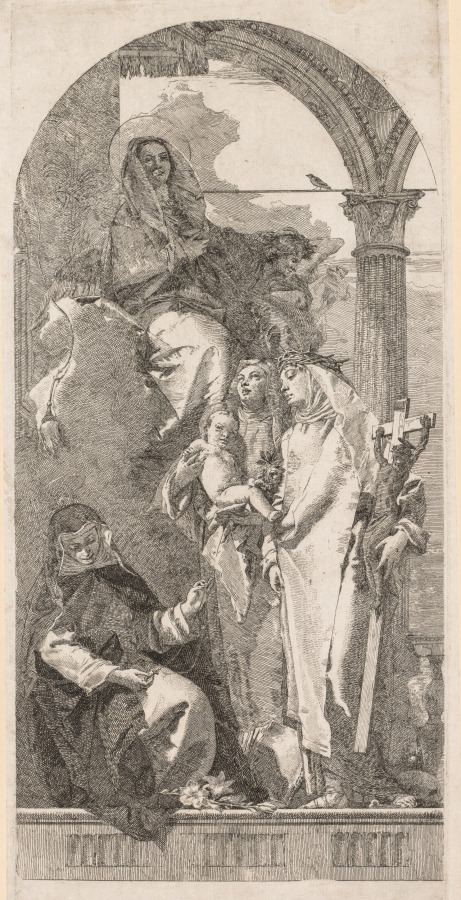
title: Madonna with Saints Agnes, Catherine and Rosa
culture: Italy, 18th century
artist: Giovanni Domenico Tiepolo (Italian, 1727–1804)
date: c. 1750s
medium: etching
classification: Print